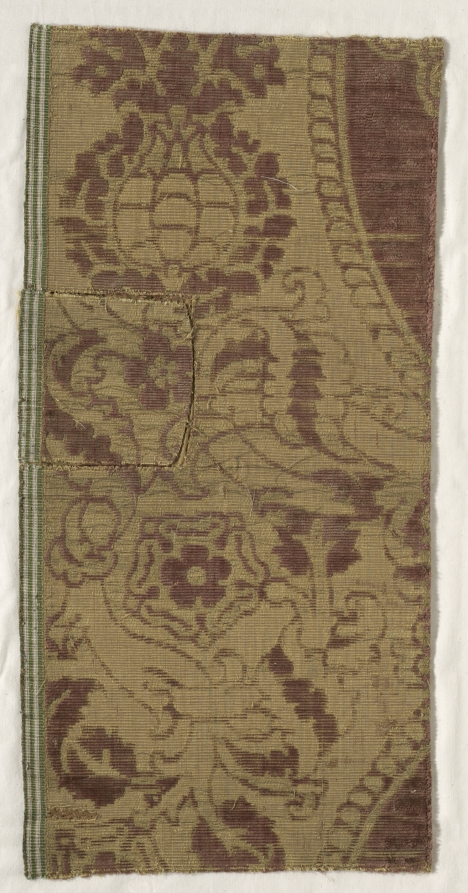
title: Fragments of Velvet Brocade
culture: Spain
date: 1500s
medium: brocaded silk velvet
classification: Velvet